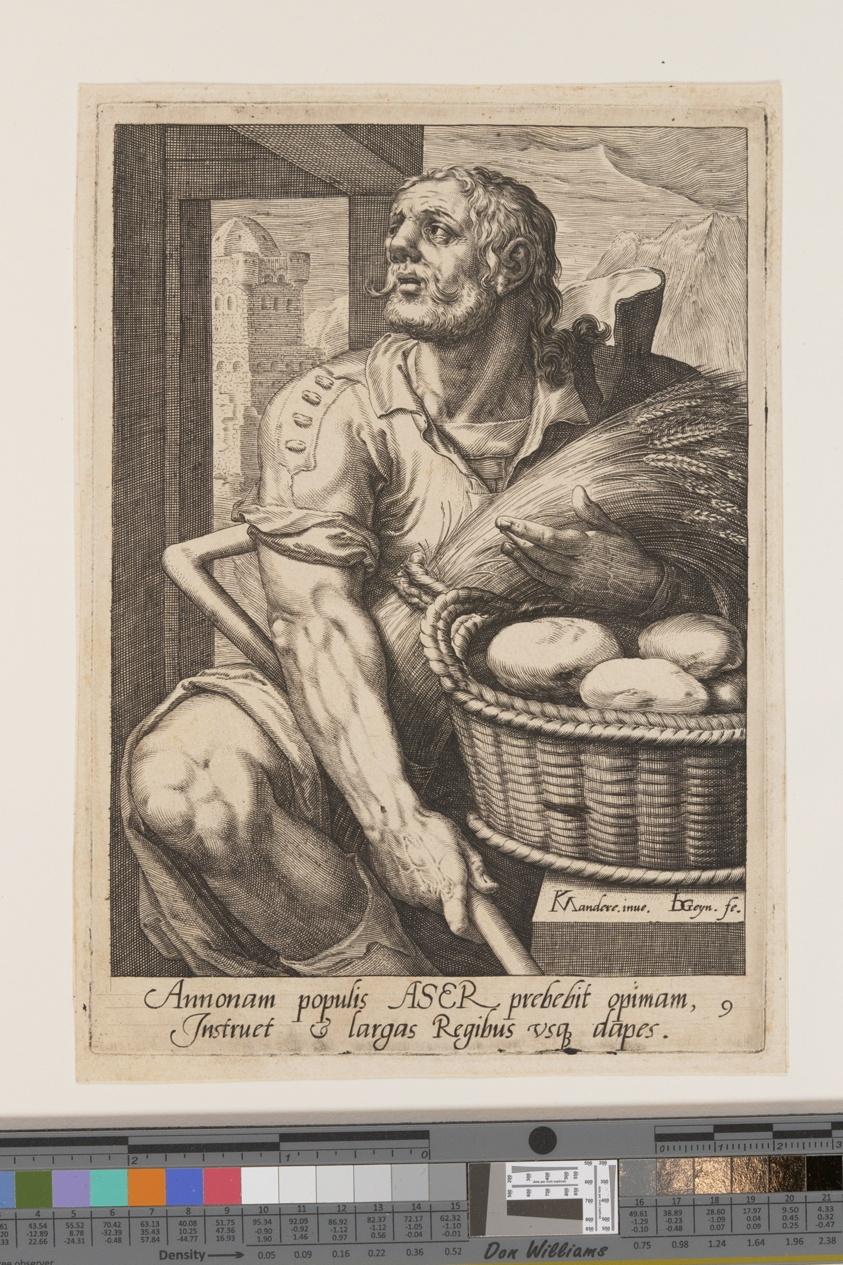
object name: Print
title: Asher, from The Twelve Sons of Jacob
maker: Jacques de Gheyn II (Dutch, 1565–1629); after Karel van Mander (Dutch, 1548–1606)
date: c. 1589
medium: Engraving on ivory laid paper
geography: Netherlands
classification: engraving; paper; print; prints and drawing